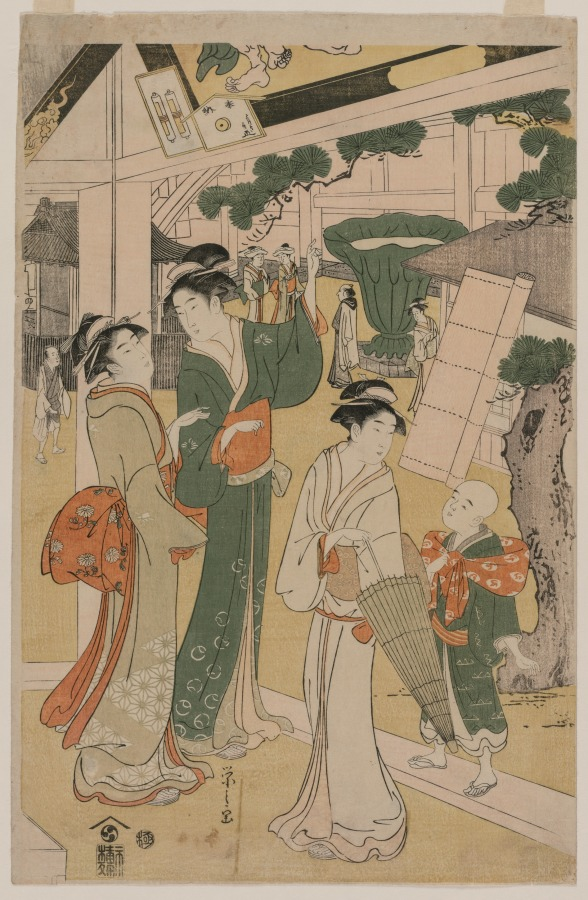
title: Print from Women Resting in the Votive Picture Hall at Asakusa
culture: Japan, Edo period (1615–1868)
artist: Chōbunsai Eishi (Japanese, 1756–1829)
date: early 1790s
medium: woodblock print from a triptych; ink and color on paper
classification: Print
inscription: Signature: Eishi ga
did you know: This print is the left print of a triptych, but while the museum also has the right print, it is missing the center print.